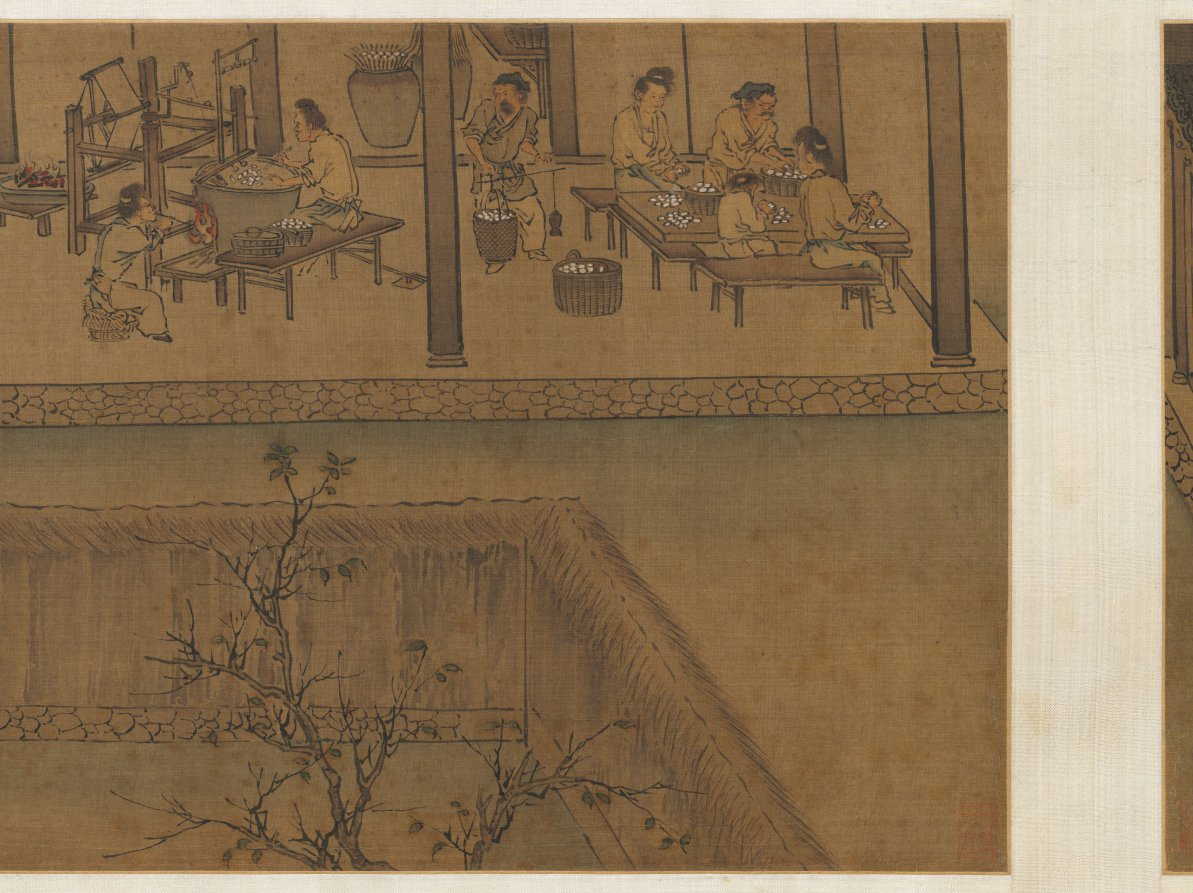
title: Sericulture (The Process of Making Silk)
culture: China, Southern Song dynasty (1127-1279)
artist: attributed to Liang Kai (Chinese, mid-1100s–early 1200s)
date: early 1200s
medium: Handscroll; ink and color on silk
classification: Painting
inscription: 3 colophons and 7 seals of Ch'eng Ch'i (20th c.).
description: By the Southern Song period, the economic center of the silk industry had shifted to the lower Yangzi delta, while the north continued to be troubled by wars. Divided into three sections, the handscroll illustrates 14 steps in the process of making silk, from the raising of silkworms to the weaving of silk cloth. The scroll’s scenes follow the illustrations of Lou Shou’s (1090–1162) Pictures of Tilling and Weaving (gengzhi tu), the first recorded painting of this genre, which was conceived in Hangzhou around 1145. However, in the Cleveland painting the artist groups several scenes of sericulture together under the roof of an open structure.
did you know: The painting is attributed to Liang Kai, a court artist active from about 1201 to 1204 at the Imperial Painting Academy in the city of Hangzhou, a major silk weaving center from that time to the present day.